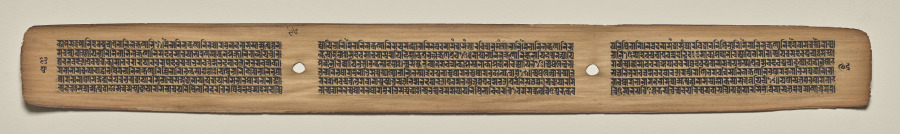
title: Text, Folio 96 (verso), from a Manuscript of the Perfection of Wisdom in Eight Thousand Lines (Ashtasahasrika Prajnaparamita-sutra)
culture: Eastern India, Bihar, Vikramashila Monastery. Painting: Nepal, Kathmandu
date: Sunday, September 14, 1119 (year 239 of the Newar Samvat in the month of Ashvina)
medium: gum tempera and ink on palm leaves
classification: Painting